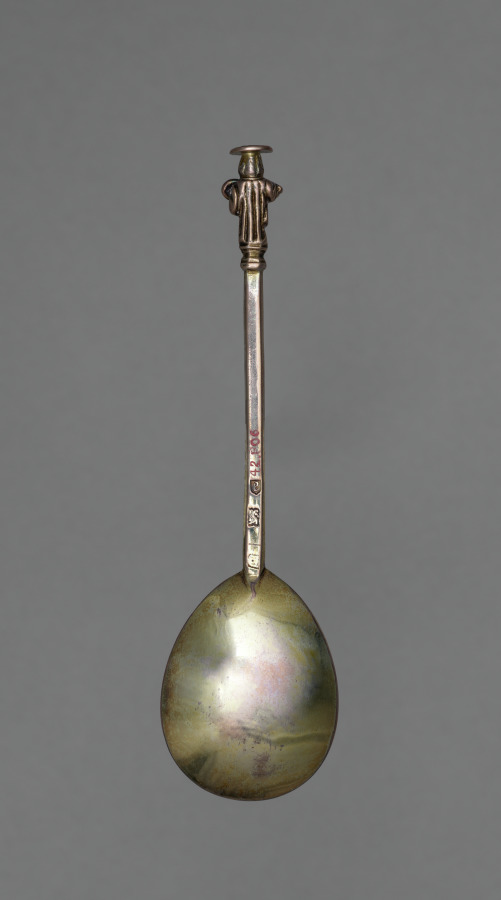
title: Apostle Spoon: St. Peter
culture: England, London, 17th century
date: 1622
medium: silver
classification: Silver